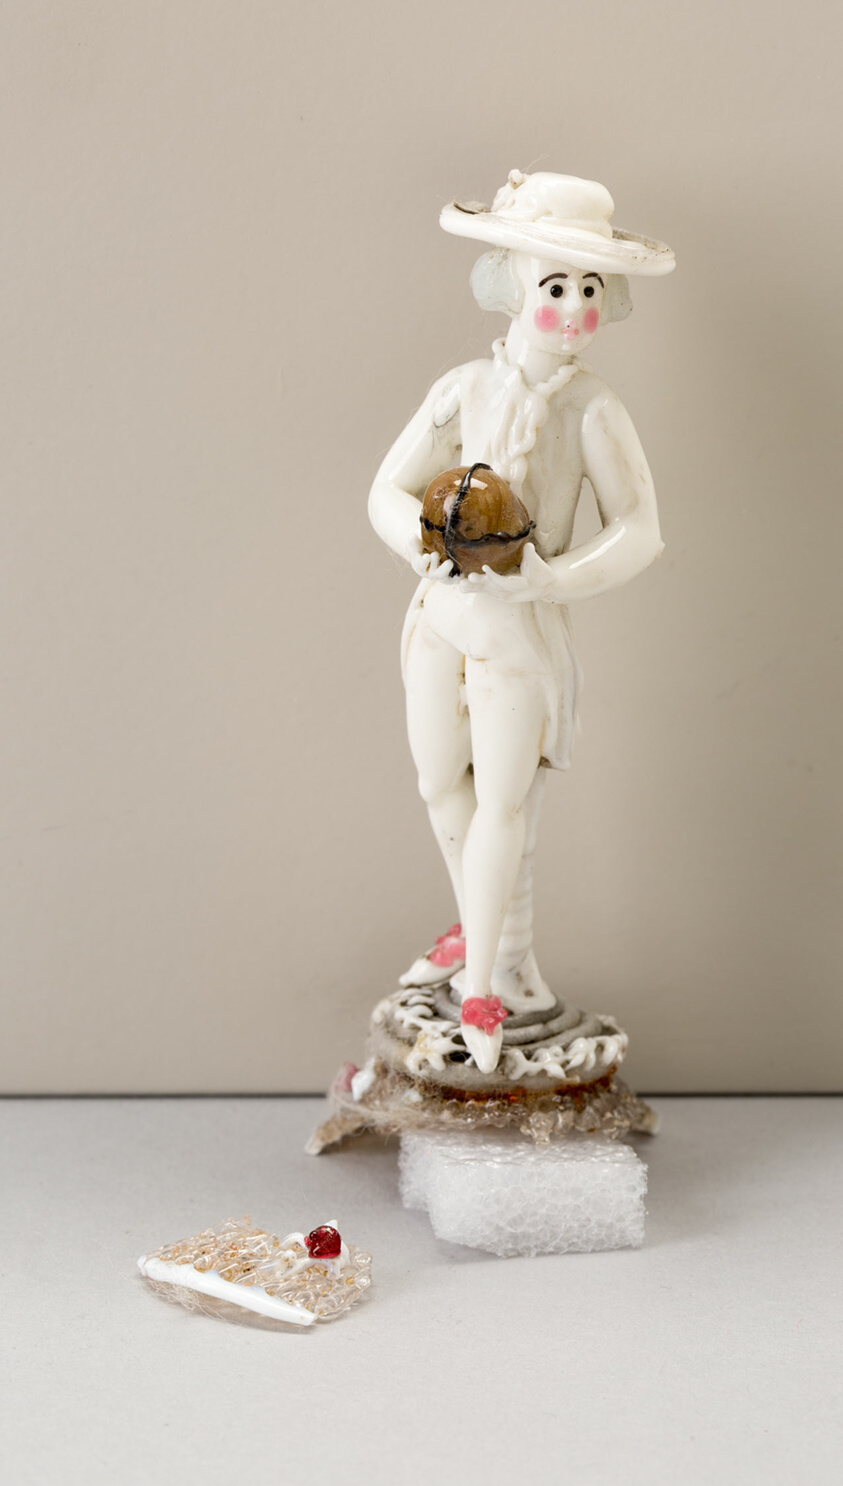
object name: Glass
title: Man Holding a Ball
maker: Nevers, France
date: 1750/99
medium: Glass; lampwork (verre de Nevers), metal armature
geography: France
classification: glass; miniature; decorative object/ornament; european decorative arts